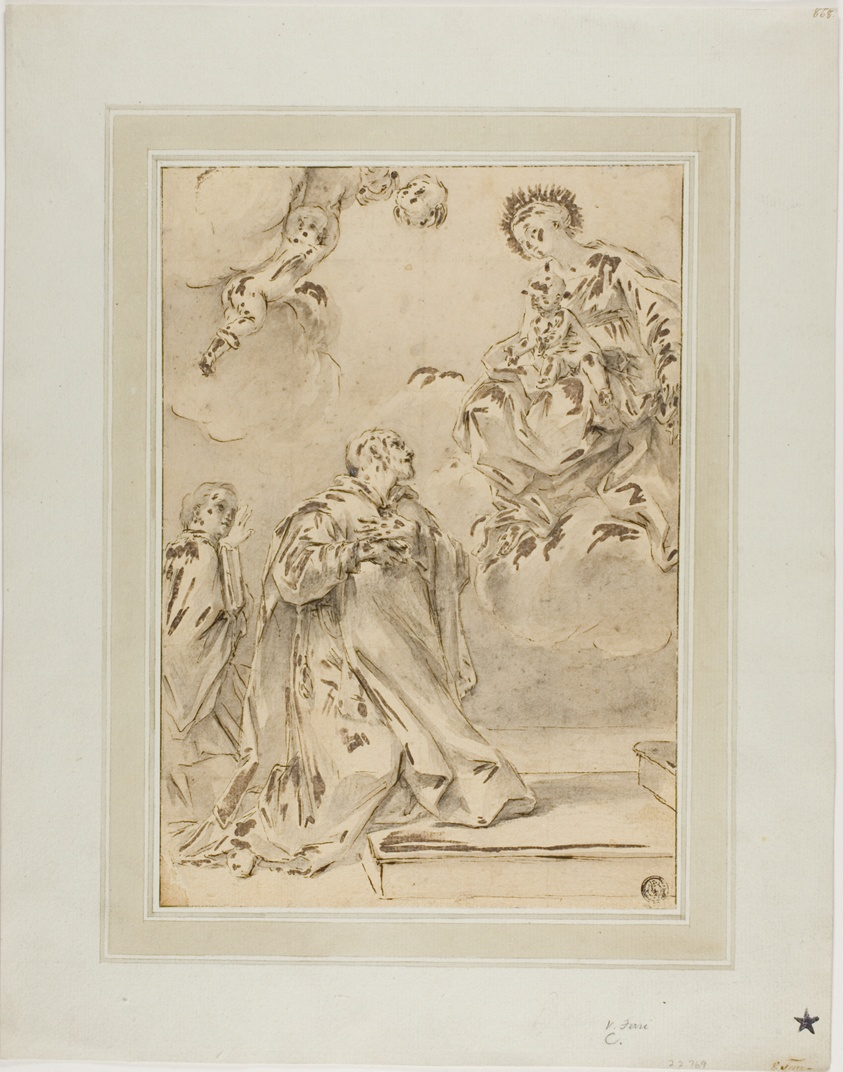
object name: Drawing and Watercolor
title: Madonna and Child Appearing to Male Saint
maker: Possibly after Ciro Ferri (Italian, 1634-1689); Style of Carlo Maratti (Italian, 1625-1713)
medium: Pen and brown ink, with brush and brown and gray wash, over traces of black chalk, squared in black chalk, on tan laid paper, laid down on ivory wove card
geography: Italy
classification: ink or chalk wash; drawings (visual works); prints and drawing